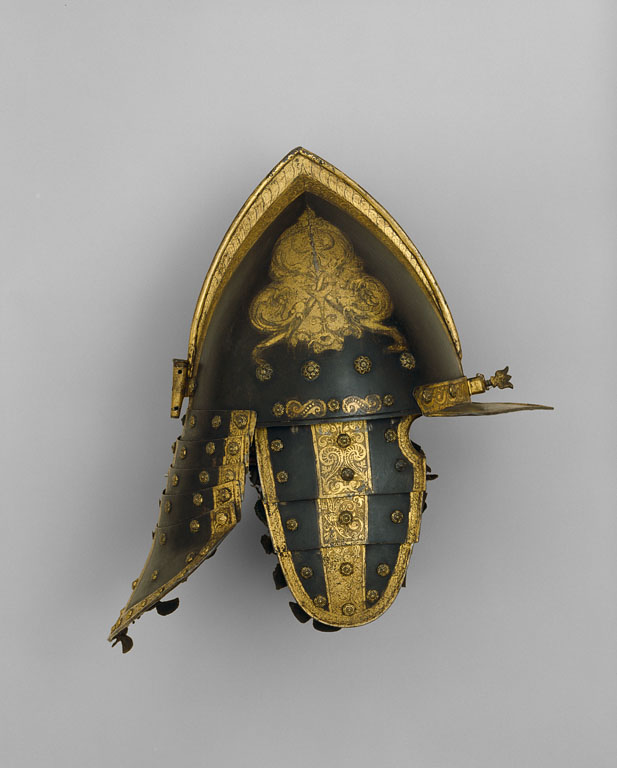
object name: Armor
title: Zischägge (Helmet) and Cuirass of Emperor Ferdinand II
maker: South German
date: c. 1620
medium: steel, gilding, brass, and leather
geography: Southern Germany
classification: suit-element; armor; arms and armor